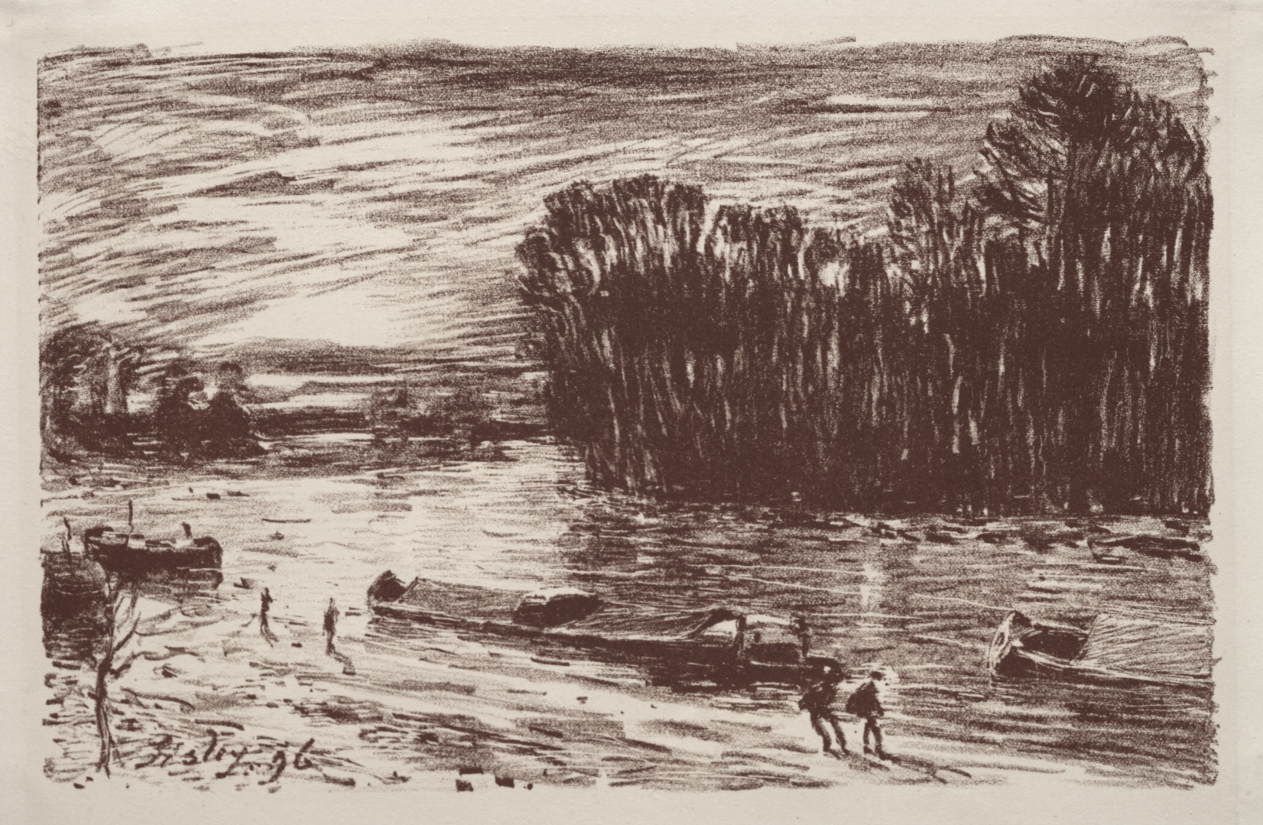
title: Bords du Loing, près Saint-Mammès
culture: France, 19th century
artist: Alfred Sisley (French, 1840–1899)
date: 1896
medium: lithograph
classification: Print